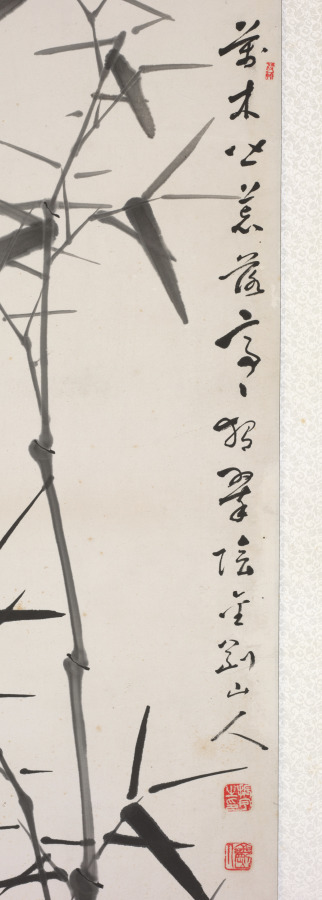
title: Bamboos in Wind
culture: Korea, Japanese colonial period (1910−1945)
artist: Kim Jin-woo (Korean, 1883–1950)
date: 1934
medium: Ten-panel folding screen; ink on paper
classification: Painting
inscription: Two chops stamped on each panel: 振宇之印 (Jinwoo’s Seal); 金剛山人 (Diamond Mountain Man)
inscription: Inscription written on the far-left panel: 甲戌流??寫於竹林堂金剛山人振宇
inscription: Inscription written on the 8th panel: 五百間淸風金剛山人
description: Active during the Japanese colonial period in Korea (1910–45), the artist Jin-woo Kim earned his artistic reputation for his expressive renditions of bamboo swaying in a strong wind. His piercing bamboo shoots are often compared to an iron spear, and their sharp leaves to a knife. It is believed that he deliberately emphasized sharpness in his brushstrokes to express his strong resistance against Japanese colonial oppression.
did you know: The artist’s prolific artistic production were a major part of fundraising efforts to support resistance activities for Korea’s independence.